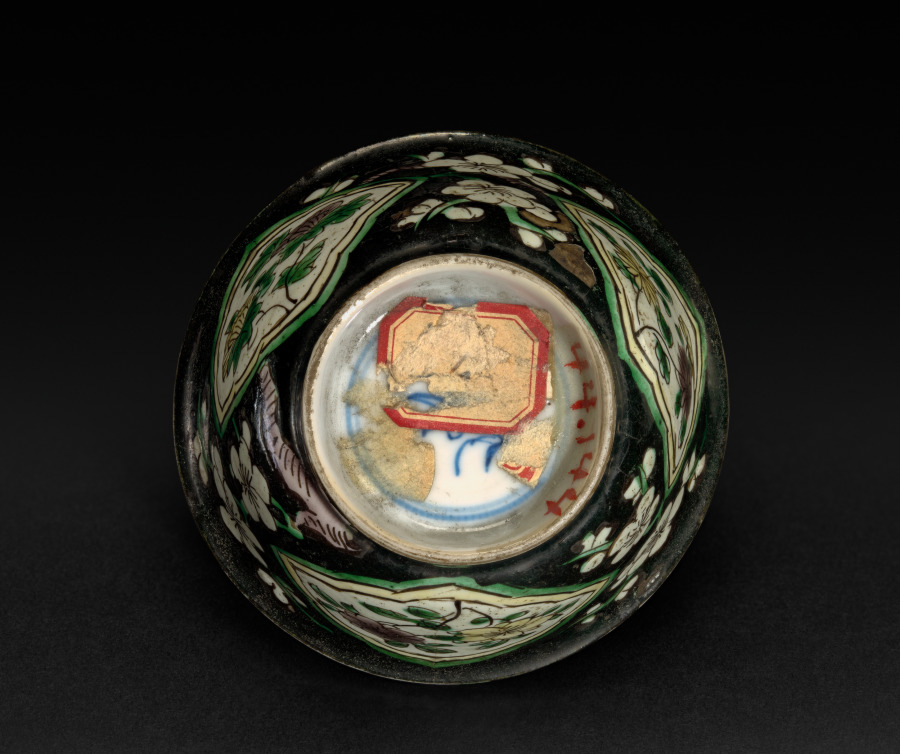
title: Cup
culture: China, Qing dynasty (1644-1911), Kangxi reign (1662-1722)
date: 1662–1722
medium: porcelain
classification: Ceramic